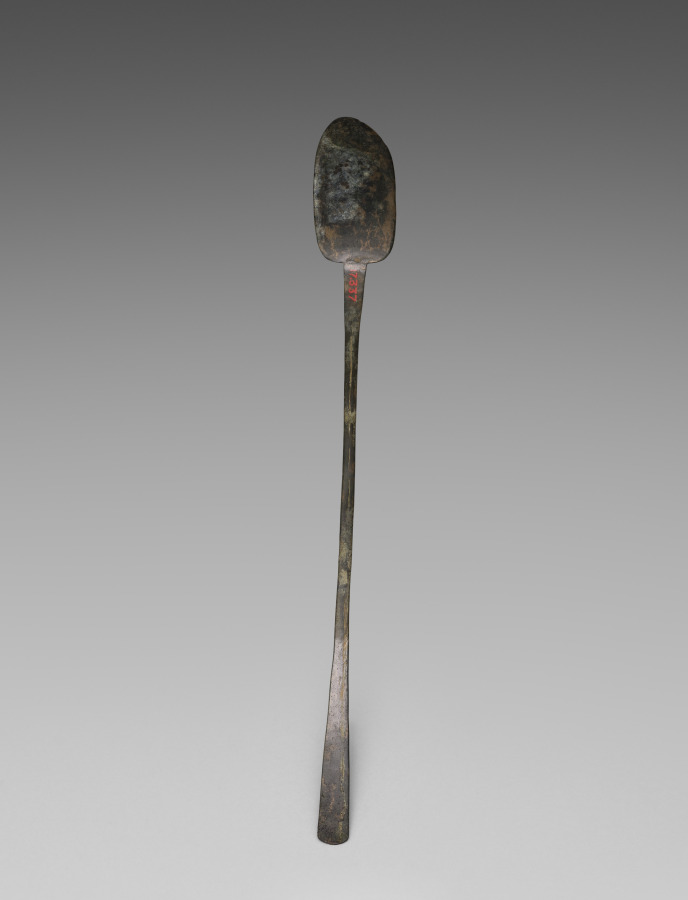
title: Spoon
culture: Korea, Goryeo dynasty (918–1392)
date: 918–1392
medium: silver bronze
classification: Metalwork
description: Celadons, spoons, seals, and bronze mirrors were the most common burial objects in tombs during the Goryeo period (918–1392). Furnishing tombs with an elaborate assemblage of objects was believed to honor and comfort the newly dead. Generally, Goryeo tombs were left untouched until the late 19th century. During the colonial period (1910–45), however, Japanese archaeologists hastily excavated the tombs located in Kaeseong, the former capital of the Goryeo period. Scholars recently have proposed that toward the end of the 14th century, Koreans enjoyed meat-based soups more than any other dishes, explaining why many more spoons than chopsticks were buried in tombs.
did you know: Bronze spoons are the most common burial item. Scholars have proposed that toward the end of the 14th century, Koreans enjoyed meat-based soups more than any other dishes, explaining why spoons became common household items as well as burial goods.